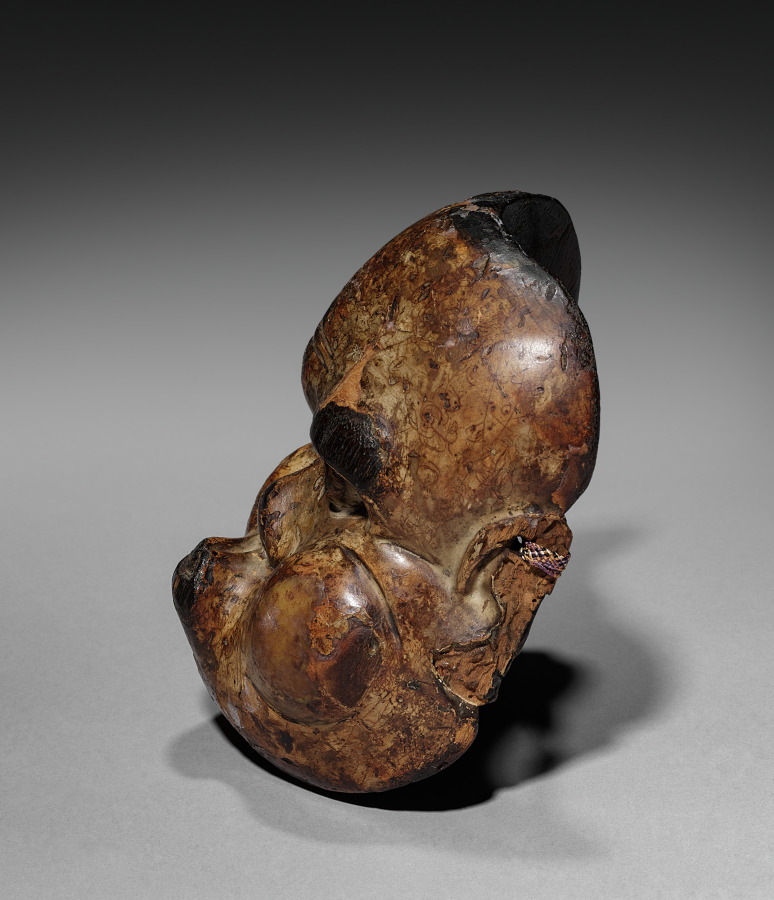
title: Kyogen Mask: Whistler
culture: Japan, Edo period (1615–1868)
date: 1600s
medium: wood with color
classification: Sculpture